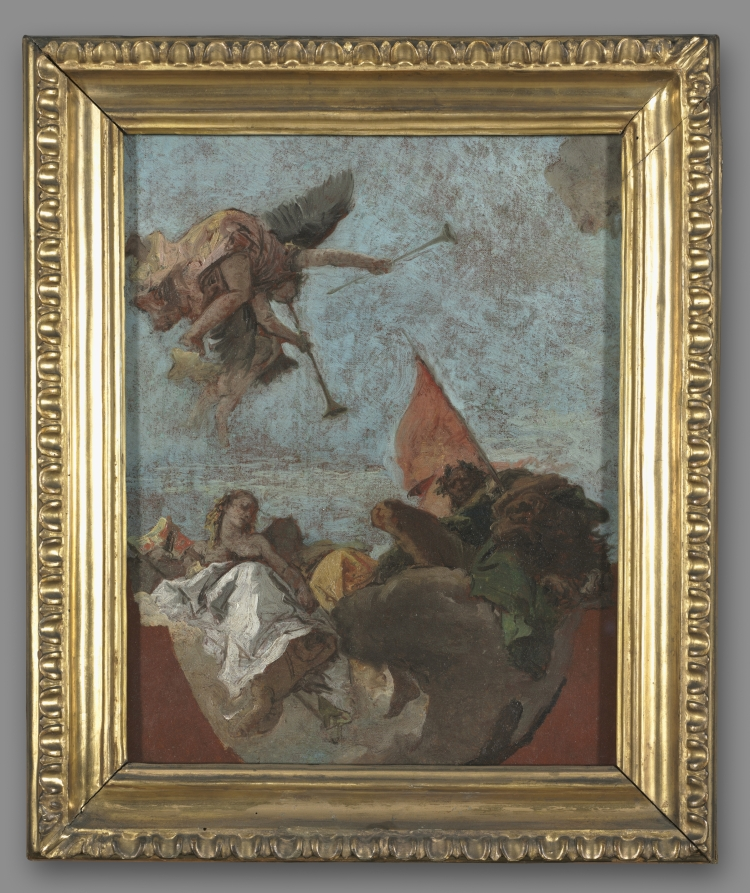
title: Sketch for a Ceiling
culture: Italy, 18th century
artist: Giovanni Battista Tiepolo (Italian, 1696–1770)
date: 1750s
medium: oil on canvas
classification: Painting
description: This small, quickly painted picture is typical of the sketches Tiepolo made as studies for larger compositions. When completed full-scale on a ceiling, works like these give the impression of a massive window, through which one can see angels or mythological beings floating among the clouds. Although we know from the work's shape that it was a study for a ceiling painting, it is not related to any of Tiepolo's finished architectural decorations. Tiepolo used such sketches to explore design problems, experiment with form and color, or give his clients an idea of how a finished project would look. With the help of a large workshop, which included two of his sons, Tiepolo completed a number of painted ceilings and decorative schemes across Europe.